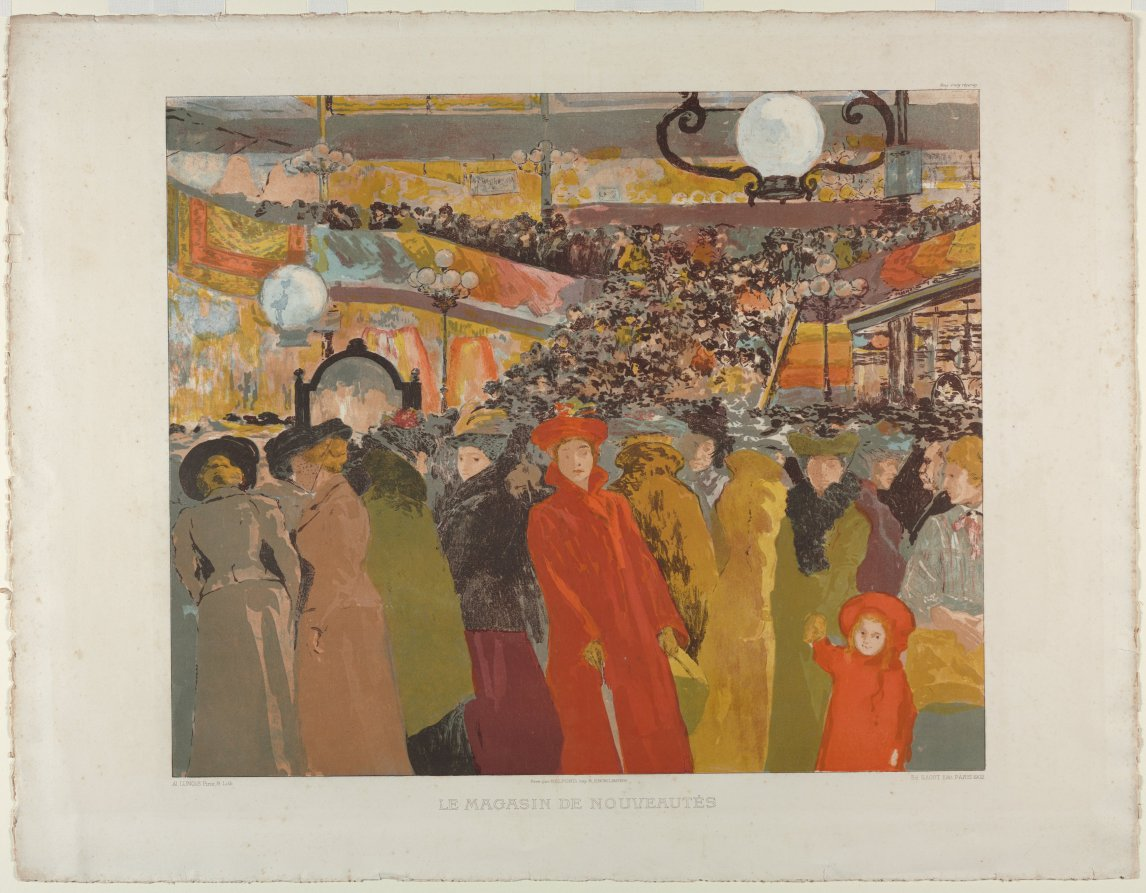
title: The Fancy Goods Store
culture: France, 20th century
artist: Alexandre Lunois (French, 1863–1916)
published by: Ed. Sagot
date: 1902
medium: color lithograph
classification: Print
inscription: Printed on plate: lower left, Al LUNOIS Pinx & Lith; lower center: Tire par BELFOND, Imp. R. ENGELMANN; lower right: Ed. SAGOT Edit. PARIS 1902; lower margin center: LE MAGASIN DE NOUVEAUTES; upper right: (printed upside down) Sno2 (printed right side up) droits reserves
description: Bonebrake was captivated by large vibrant works that exemplify expert color printing and attract attention when framed and displayed. The Fancy Goods Store, which depicts the Paris department store Le Bon Marché, is perhaps Lunois’s finest print.